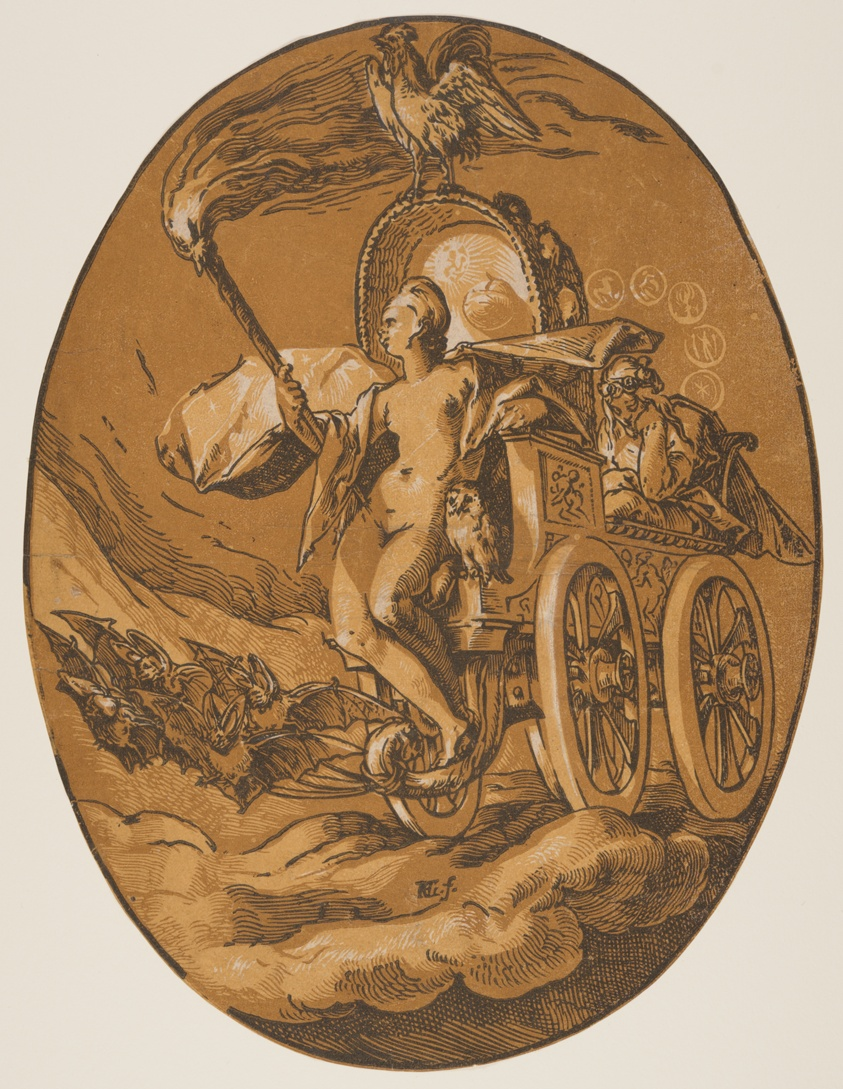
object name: Print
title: Nox, from The Deities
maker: Hendrick Goltzius (Dutch, 1558–1617)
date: 1588/90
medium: Chiaroscuro woodcut from three blocks in ochre and brown on ivory laid paper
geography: Netherlands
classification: print; paper; prints and drawing; woodcut